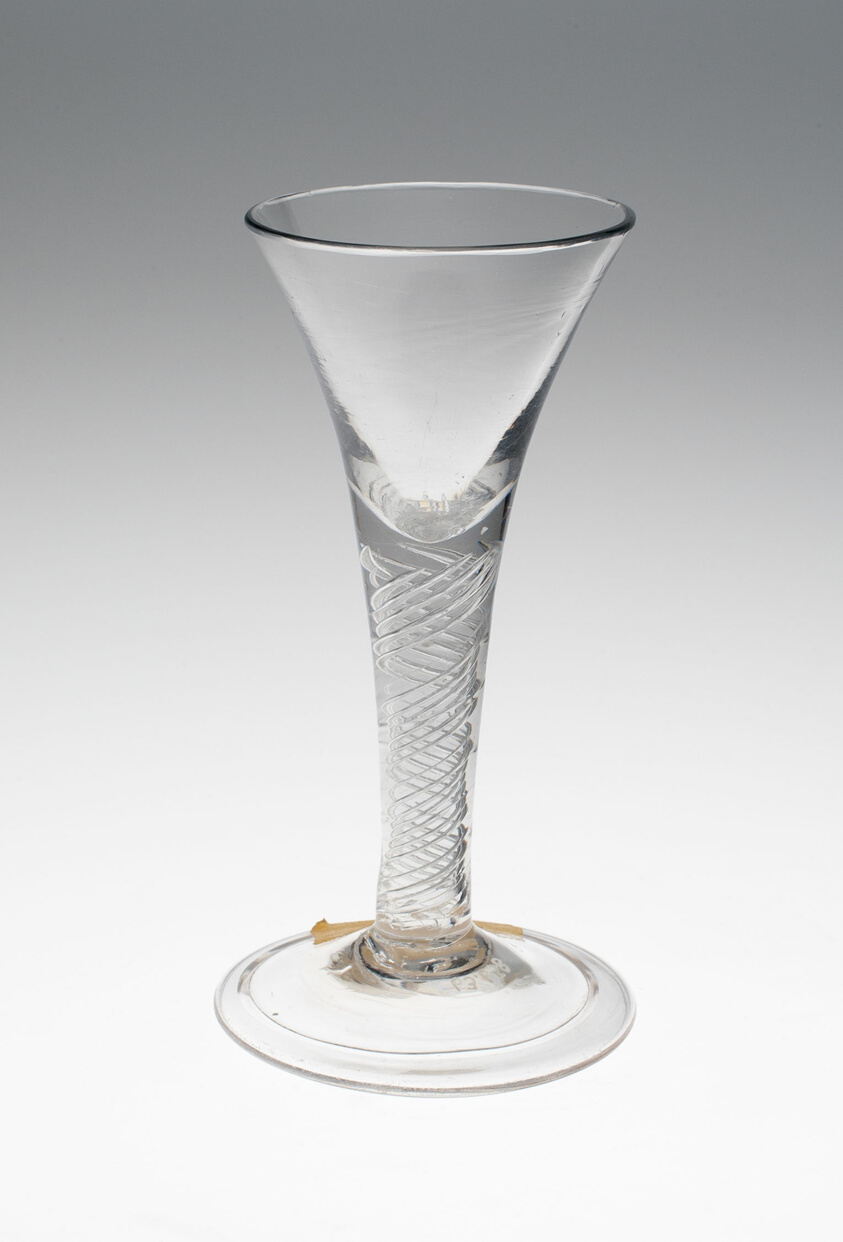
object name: Glass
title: Wine Glass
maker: England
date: c. 1730/50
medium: Glass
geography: England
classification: drinking vessel; glass; european decorative arts